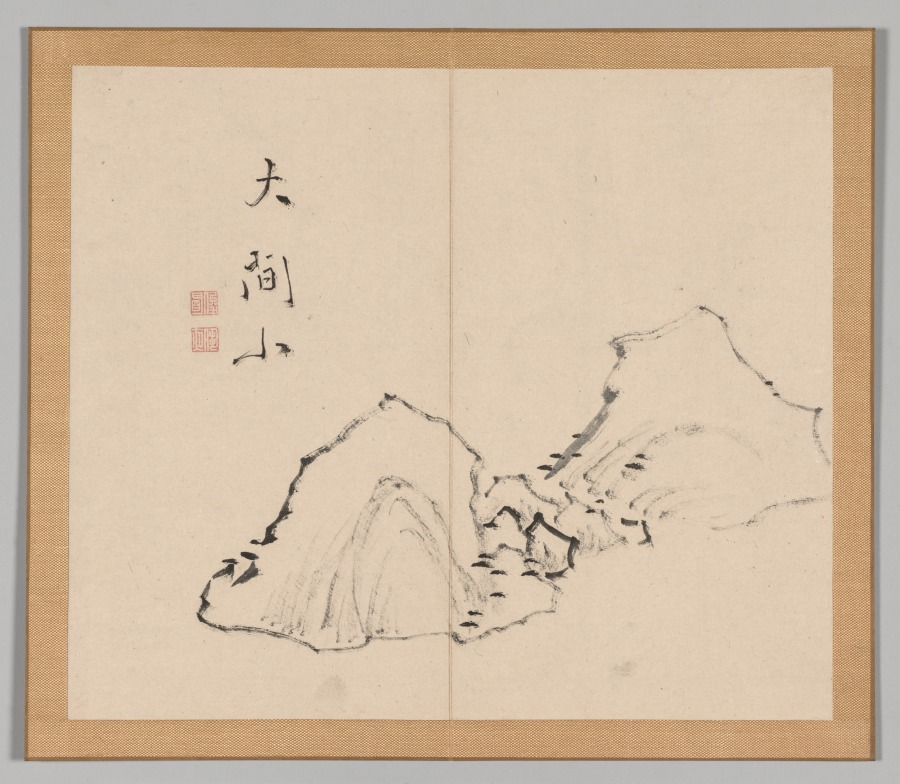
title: Reverberations of Taiga, Volume 1 (leaf 6)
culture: Japan, Edo period (1615–1868)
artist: Aoki Shukuya (Japanese, d. 1802)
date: mid- to late 1700s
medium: double-leaf from a pair of albums; ink and light color on paper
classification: Portfolio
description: Traditionally, young painters in Japan began their studies with an established master-painter. The master's compositions invariably became models that the apprentice copied to learn various ink and brush techniques. Shukuya was a pupil of the famous Kyoto artist Ikeno Taiga, whose style is reflected in these sketches of rocks, trees, and mountains.